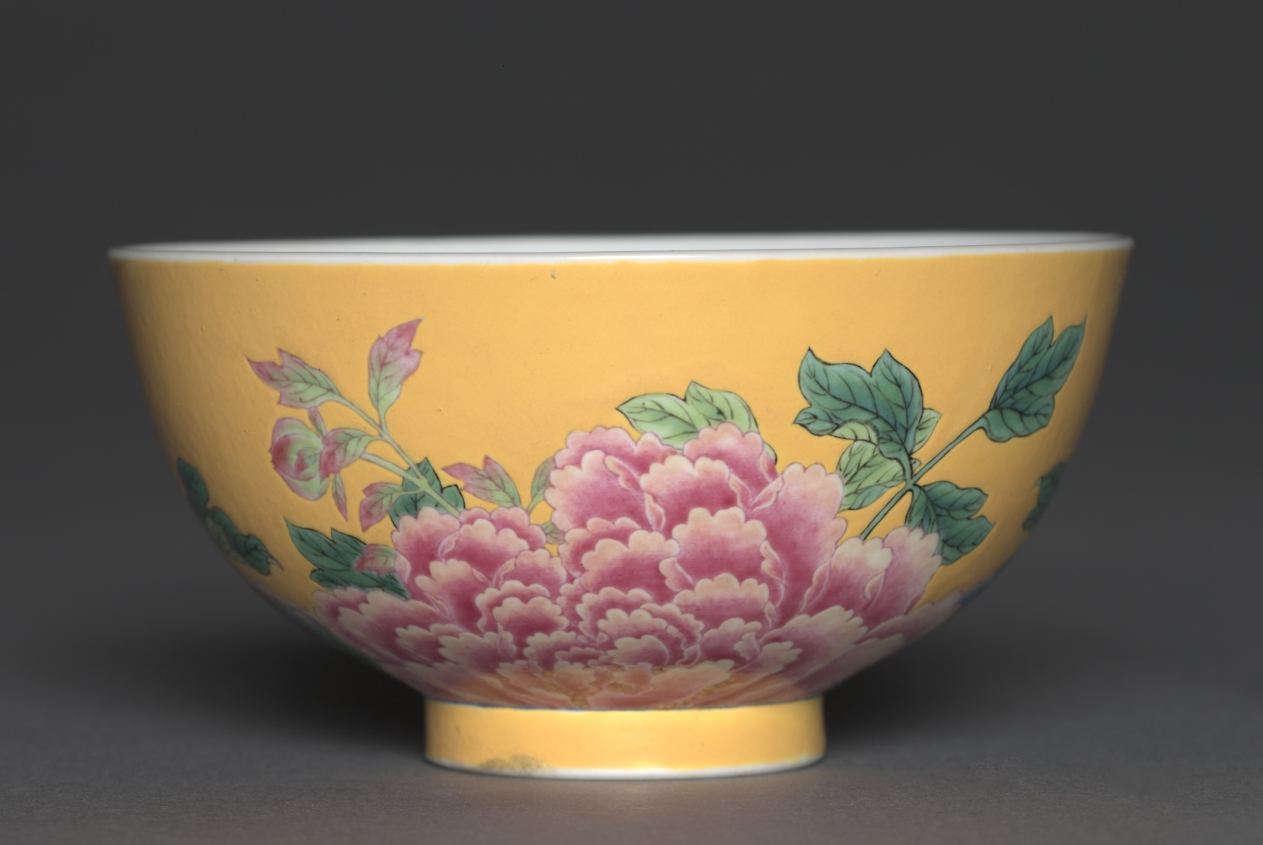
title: Bowl with Peonies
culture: China, Jiangxi province, Jingdezhen kilns, Qing dynasty (1644-1911), Kangxi mark and reign (1661-1722)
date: 1662–1722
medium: porcelain with foreign color (yangcai) overglaze enamel decoration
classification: Ceramic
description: This bowl was made at the Jingdezhen kilns and then decorated probably in the Imperial Palace workshops in Beijing.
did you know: In East Asian art, peonies traditionally symbolize prosperity and wealth.